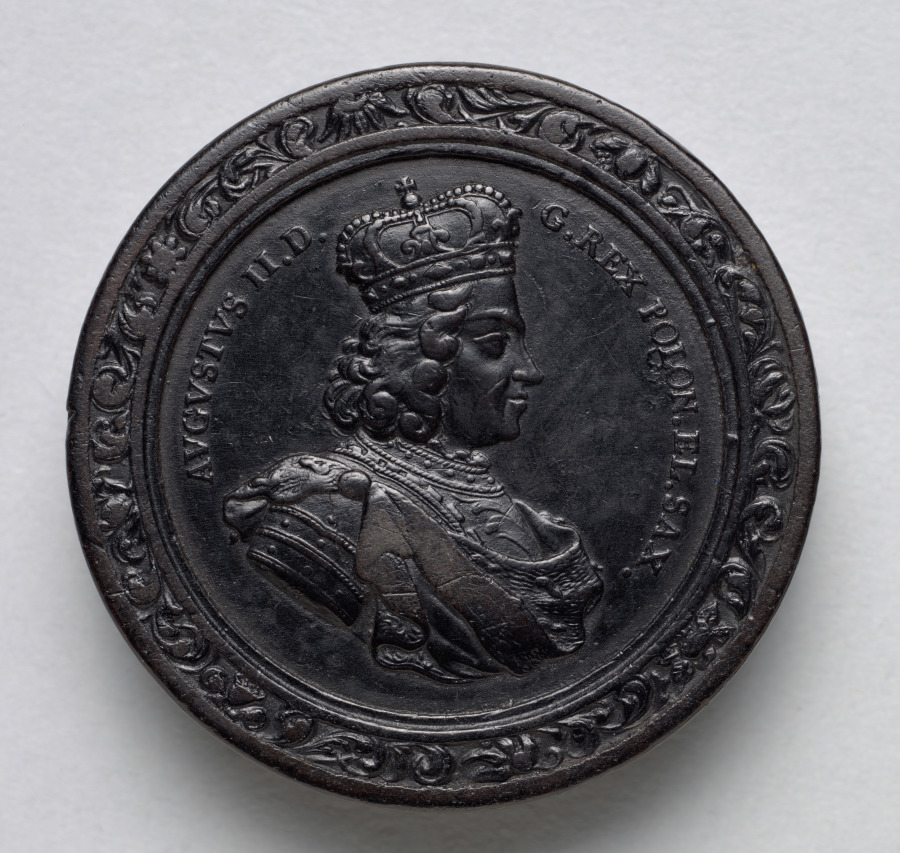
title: Gaming Piece (obverse)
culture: Germany, late 17th-early 18th Century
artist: Martin Brunner (German, 1659–1725)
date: c.1700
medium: wood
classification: Furniture and woodwork